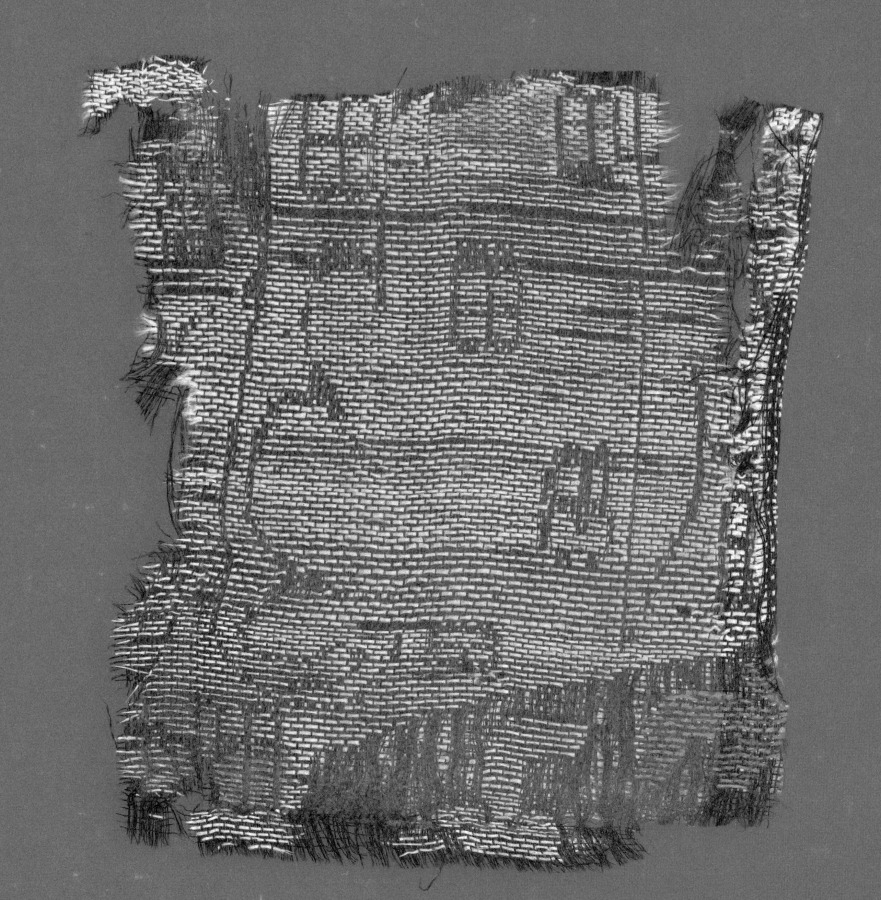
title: Three Fragments of Italian Gothic Silk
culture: Italy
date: 1300s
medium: silk and gold thread: lampas weave, brocaded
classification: Textile